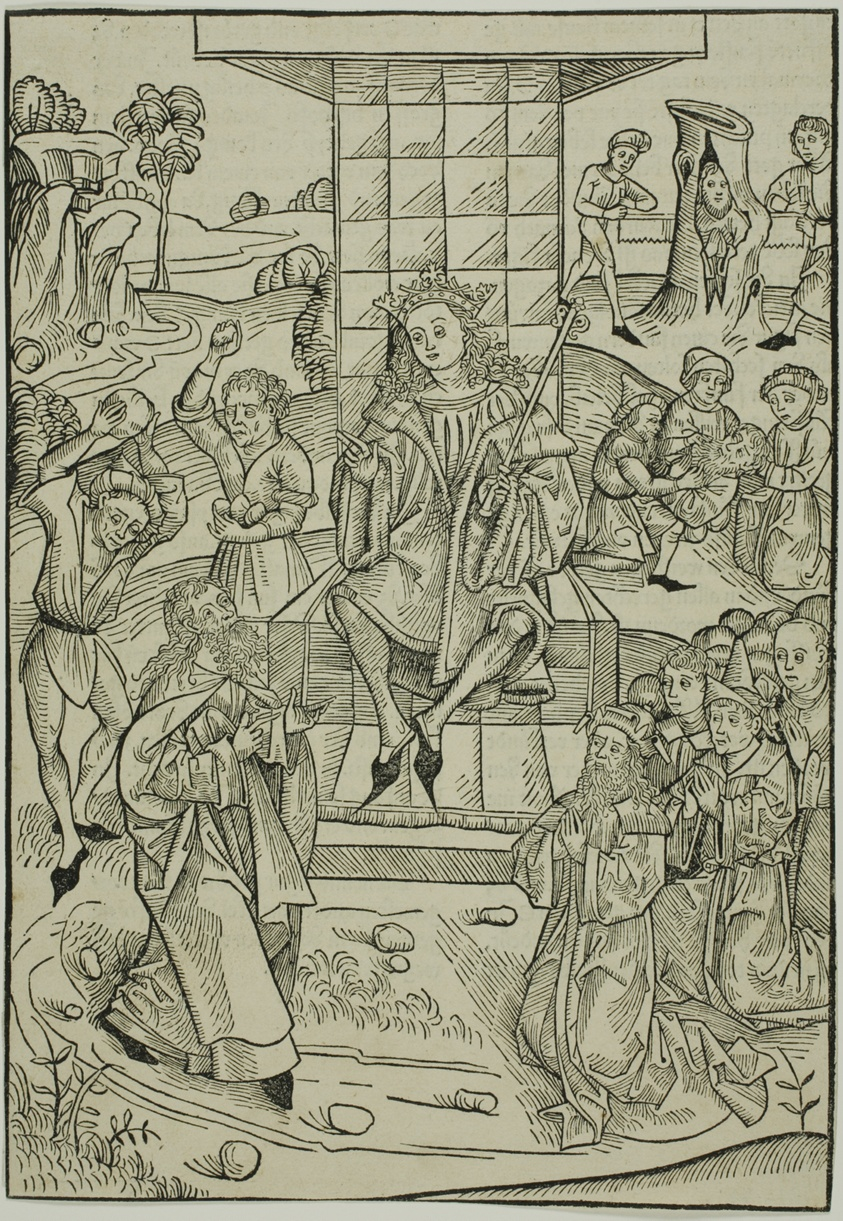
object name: Print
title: The Stoning of Zacharias and Isaias, page 9 from the Treasury (Schatzbehalter)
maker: Michael Wolgemut and Workshop (German, 1434/37–1519); published by Anton Koberger (German, 1440–1513)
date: 1491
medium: Woodcut on ivory laid paper with letterpress on verso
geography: Germany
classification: woodcut; print; prints and drawing